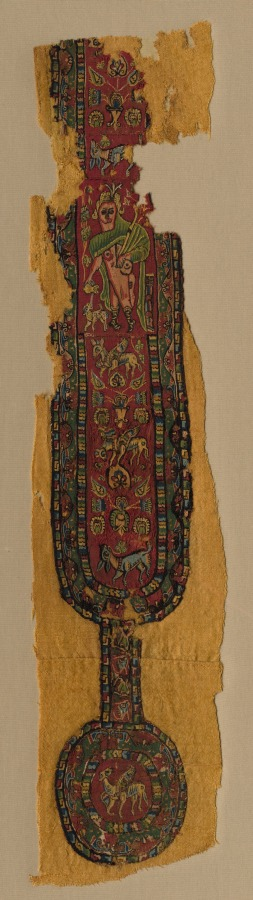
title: Clavi (Decorative Band)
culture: Egypt, Umayyad period (661–750) or Abbasid period (750–1258)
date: 700s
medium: wool; plain weave with slit-tapestry weave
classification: Textile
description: Figures and winged animals from ancient Greece and Rome remained popular during the early Islamic period of the Umayyad and Abbasid dynasties. The naked figure could represent Dionysus, the Greek god of wine; he holds his thyrsus, a staff decorated with ivy leaves and pinecones, while pouring liquid from a small jug for the panther. These colorful designs probably adorned the sleeve and front or back of a tunic, a garment worn directly on the body for over 1,000 years, from Roman antiquity to the Middle Ages. Popular decorations were regularly reused and sewn onto new tunics, as can be seen on this winter garment made of wool.